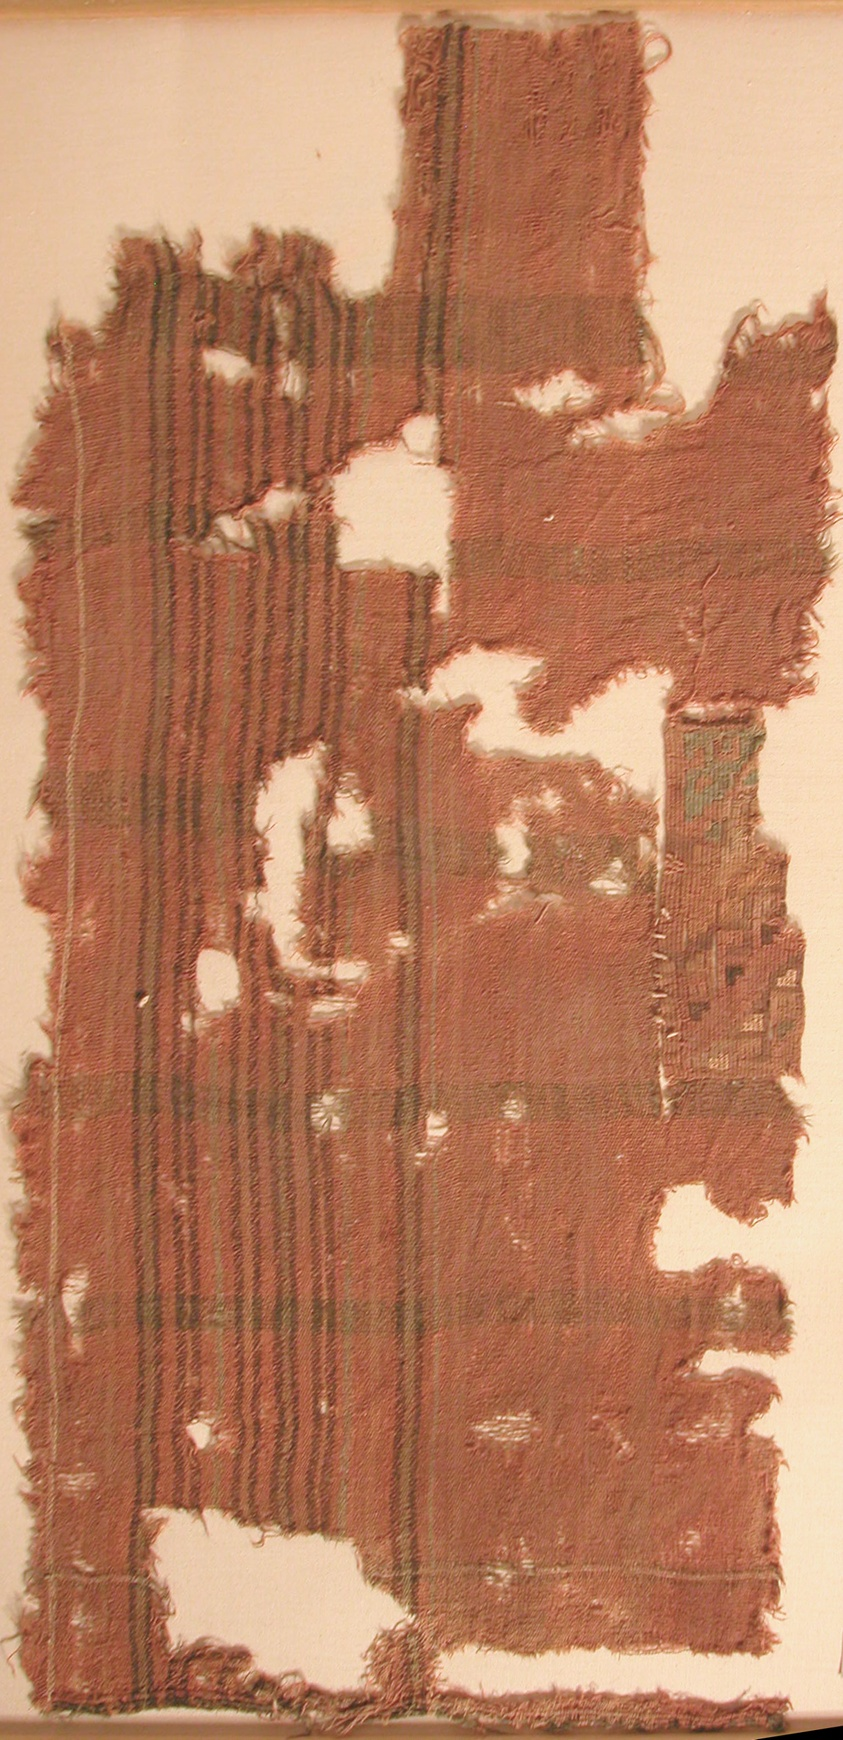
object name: Textile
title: Fragment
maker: Peru, north coast, Culebra Valley, La Capilla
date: A.D. 1000/1476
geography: Peru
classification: textile; weaving